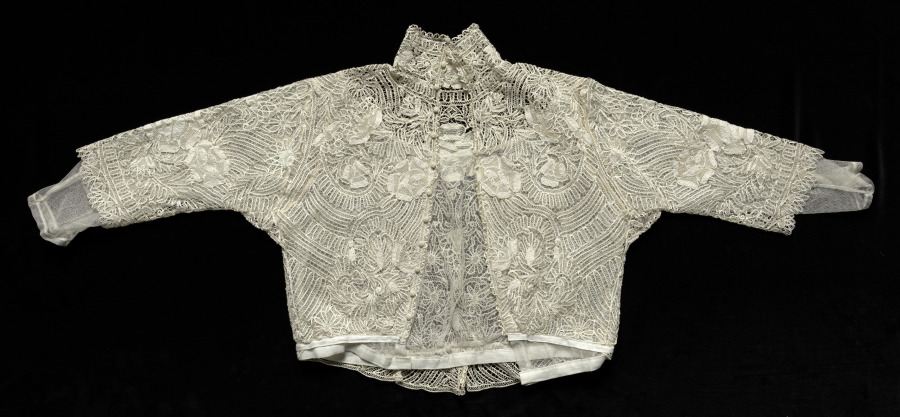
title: Lace Blouse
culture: Czechoslovakia, Bohemia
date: 1880–1948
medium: Linen: needle lace and bobbin lace (tape lace)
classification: Lace